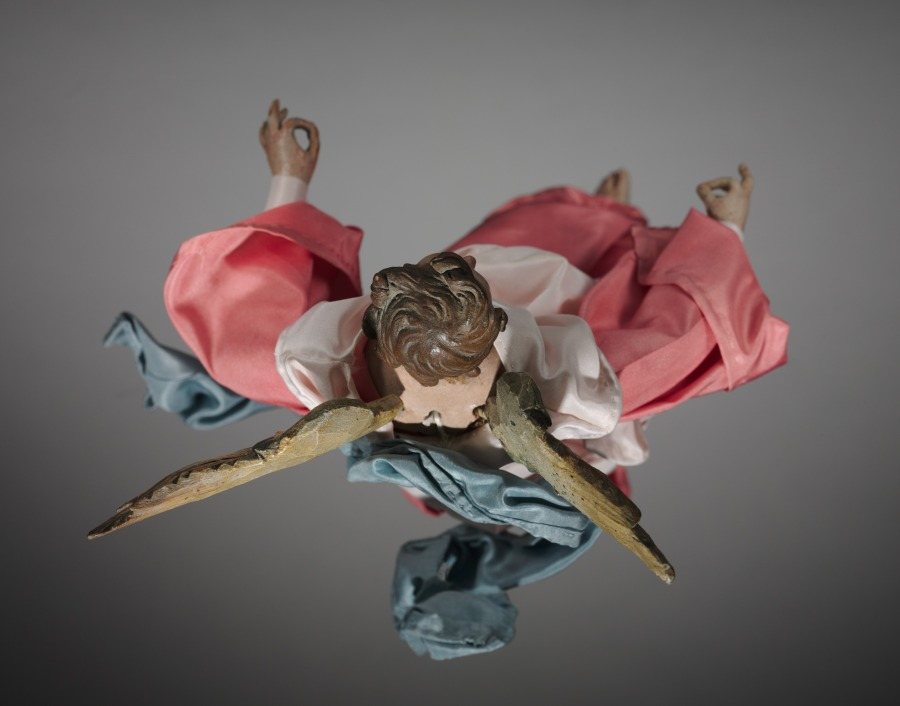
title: Figure from a Crèche: Angel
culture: Italy, Naples, late 18th-early 19th century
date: 1780–1830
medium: painted wood and terracotta with various textiles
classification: Sculpture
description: The practice of creating scenes of the Nativity for the home dates from the early 1700s in Italy, where people began to set up doll-like figures of about a foot or less in height. The custom was particularly popular in Naples around 1800, where crèche scenes (crèche means cradle, or crib) included many figures, whose heads and hands of painted terracotta, stuffed cloth bodies, and clothing adapted from contemporary local costumes gave them an amazingly realistic character. Representations of the birth of Jesus can be traced to the first few centuries of Christianity. Both living creatures and sculptural depictions of them were used from early times. By the late middle ages it was customary to create life-size figures of wood or stone, naturalistically painted, to represent the characters who participated in the events of Jesus's early life. These sculptures were then arranged in scenes illustrating one or both of the most important of these events, the Adoration of the Shepherds and the Adoration of the Magi-the three kings from the East who came to pay homage to the Christ child. Used in churches, these large figures were especially popular in Italy, Central Europe, Spain, and Portugal. This Object in Focus presentation was organized by Henry Hawley, Curator of Renaissance and Later Decorative Arts and Sculpture.